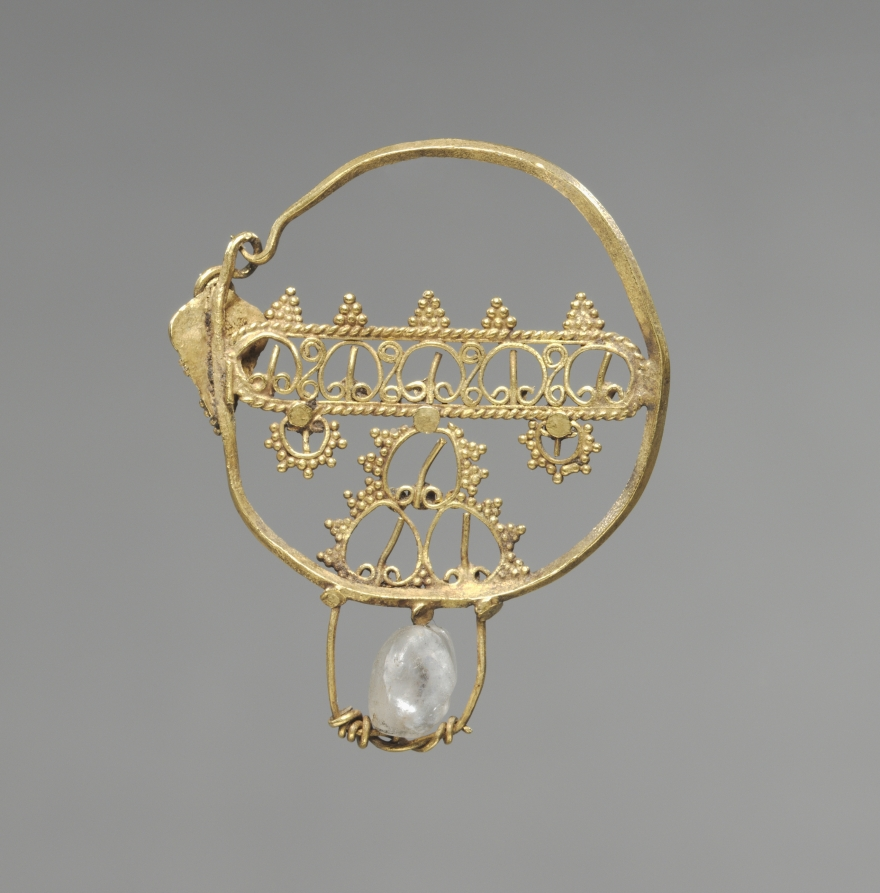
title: Earring with Openwork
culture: Byzantium, early Byzantine period, 7th-9th Century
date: 600–800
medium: gold with a rock crystal bead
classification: Jewelry